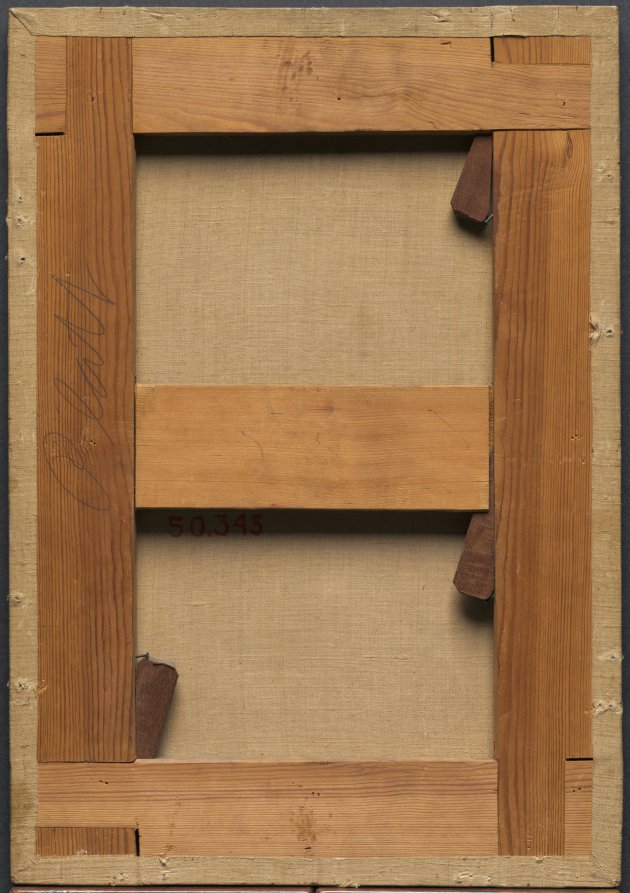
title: Crucifixion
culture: Spain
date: 1800s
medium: oil on canvas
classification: Painting